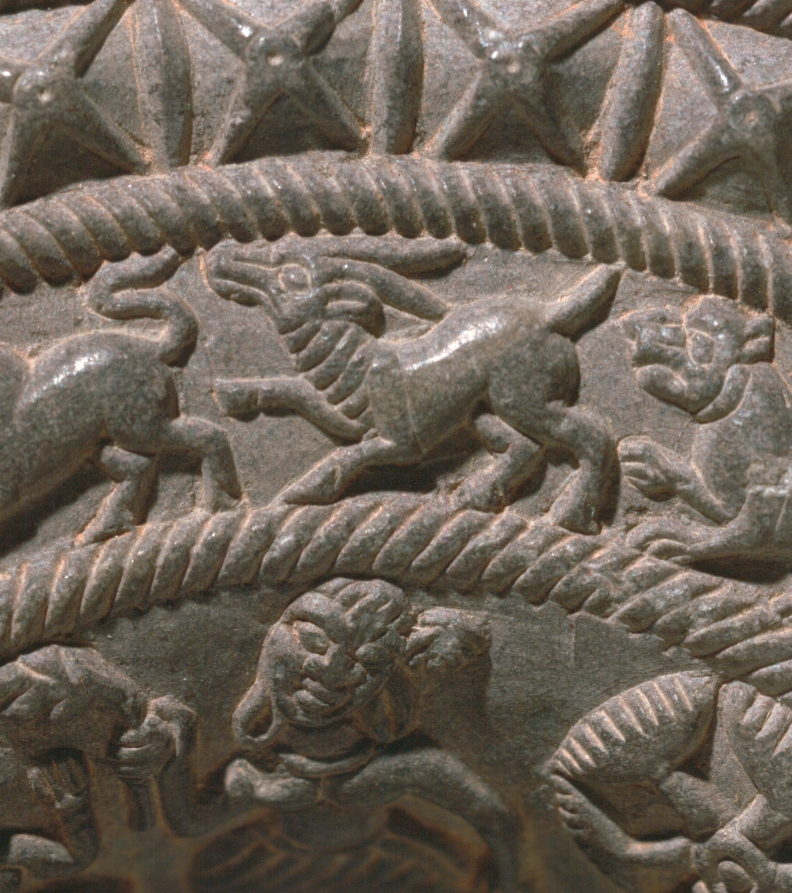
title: Ringstone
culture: India, Maurya period (322–185 BCE)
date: 200s BCE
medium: steatite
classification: Sculpture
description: Ringstones are among the earliest works of art to be created in stone during India's historical period. This example is finely carved with detailed images of affectionate couples and palm trees, running animals, and geometric motifs in concentric circles. The function of ringstones remains uncertain, since none of the surviving examples is inscribed or explained in a text.